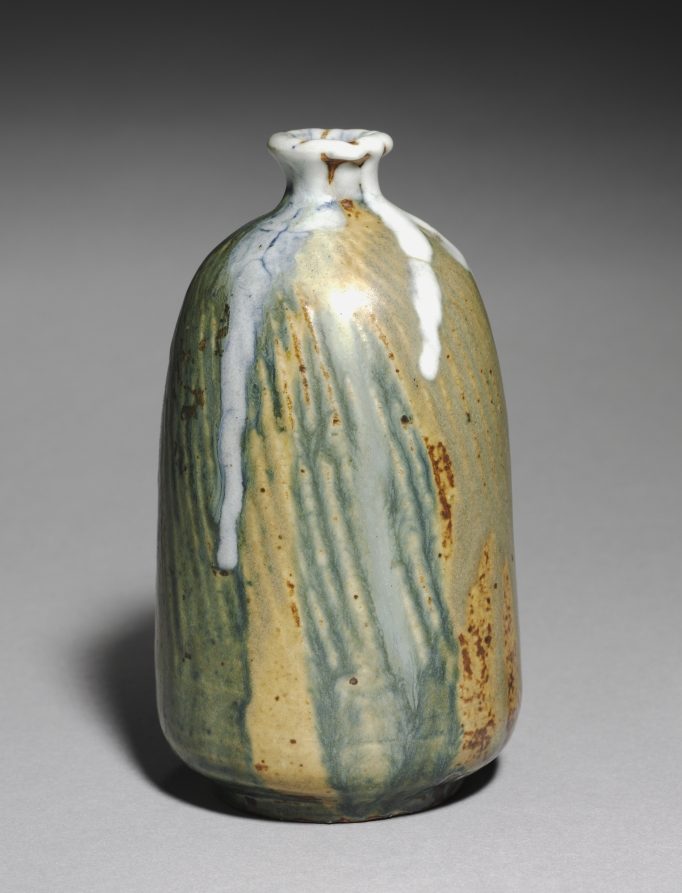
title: Vase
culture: France, 19th century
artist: Jean Carriès (French, 1855–1894)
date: c. 1890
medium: stoneware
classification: Ceramic